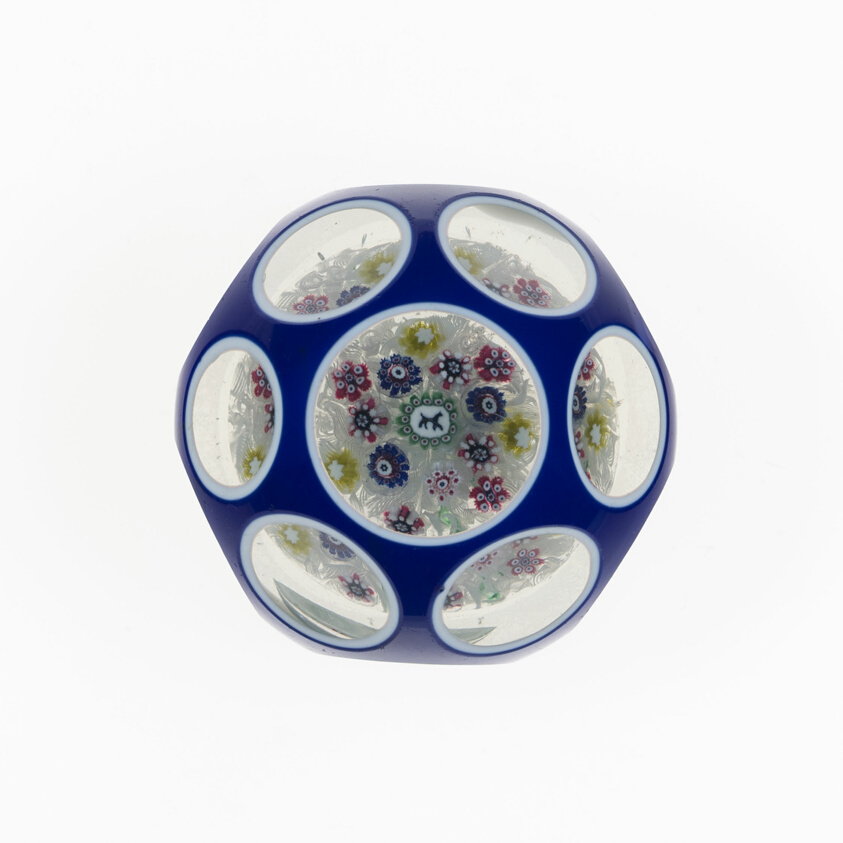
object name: Glass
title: Paperweight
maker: Saint-Louis Glassworks (Cristalleries de Saint-Louis); Lorraine, France, founded 1586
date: Mid 19th century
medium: Glass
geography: France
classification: paperweight; glass; european decorative arts